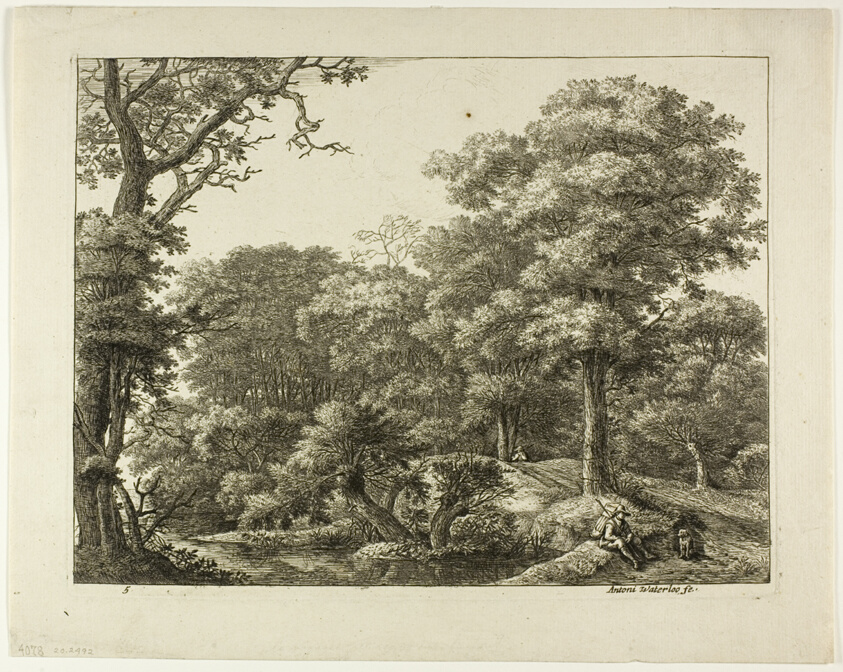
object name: Print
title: The Wayfarer Resting in the Forest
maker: Anthonie Waterloo (Dutch, c. 1610-1690)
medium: Etching on paper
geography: Holland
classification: etching; print; prints and drawing